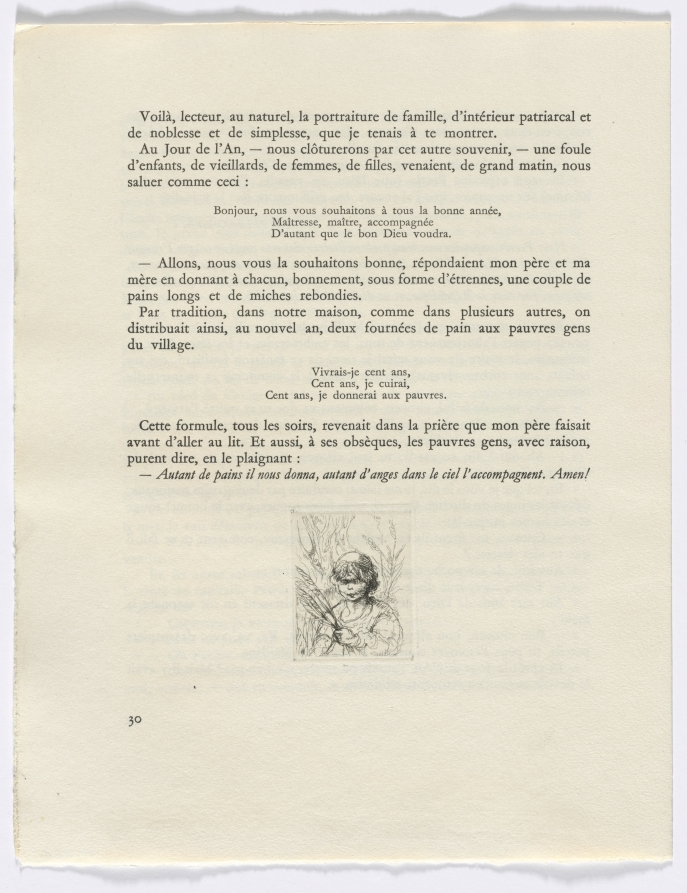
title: Frédéric Mistral: Mémoires et Recits by Frédéric Mistral: bust of a child (page 30)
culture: France, 20th century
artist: Auguste Brouet (French, 1872–1941)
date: 1937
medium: etchings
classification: Portfolio